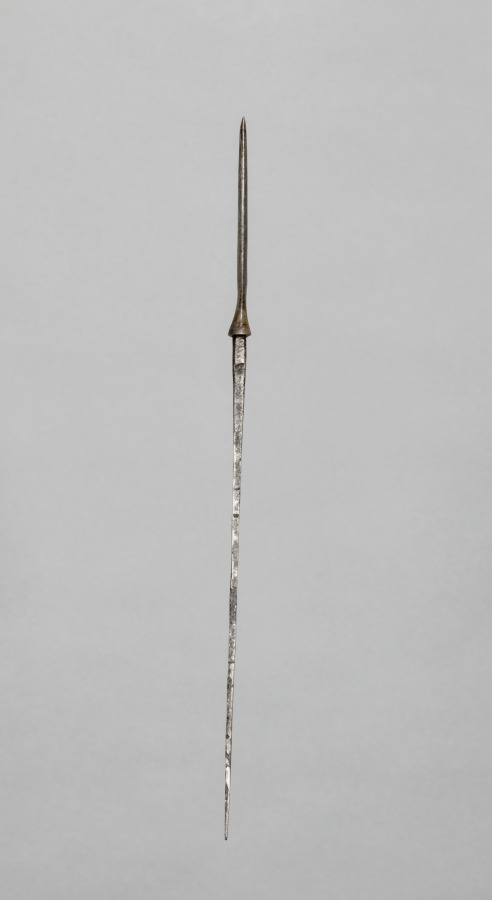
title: Arrow Point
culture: Japan, Edo period (1615–1868)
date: 1700s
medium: steel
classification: Arms and Armor